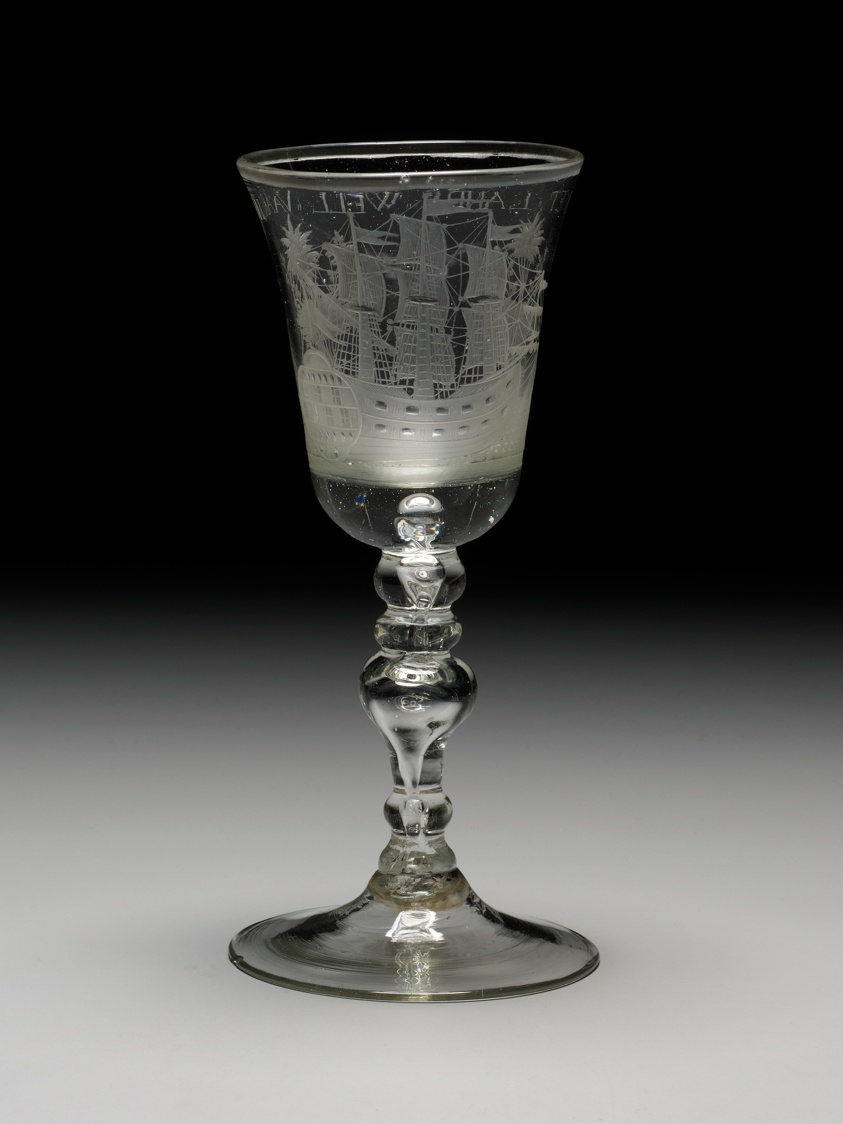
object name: Glass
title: Wine Glass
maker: Netherlands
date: c. 1725/50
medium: Glass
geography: Netherlands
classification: drinking vessel; glass; european decorative arts